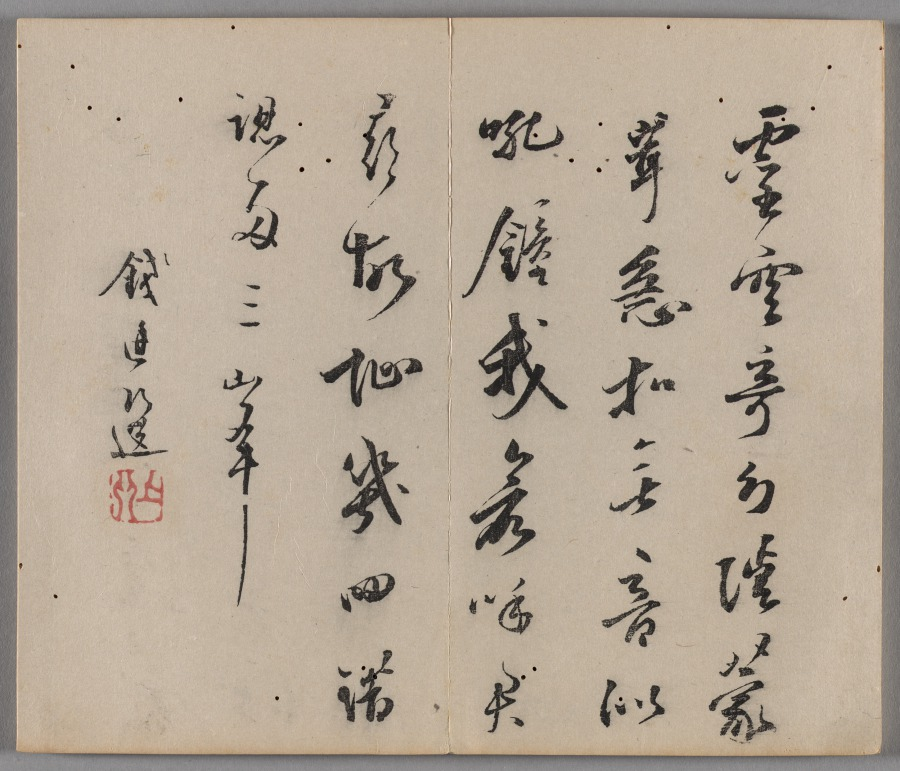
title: Ten Bamboo Studio Painting and Calligraphy Handbook (Shizhuzhai shuhua pu): Rocks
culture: China, Qing dynasty (1644-1911)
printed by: Hu Zhengyan (Chinese, c. 1584–1674)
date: 1633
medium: Woodblock-printed book; ink and colors on paper; first edition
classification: Print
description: Color printing reached a level of perfection in the early 1600s, as seen in this Ten Bamboo Studio Collection of Calligraphy and Painting and the Mustard Seed Garden Manual of Painting (printed 1679 and 1701). The painterly quality, precision in registering (aligning) the woodblocks, and harmonious colors made them the most successful color print editions in Chinese history. Both editions were printed and compiled in Nanjing, spread nationwide, and had a great impact on the arts in Japan and Korea.